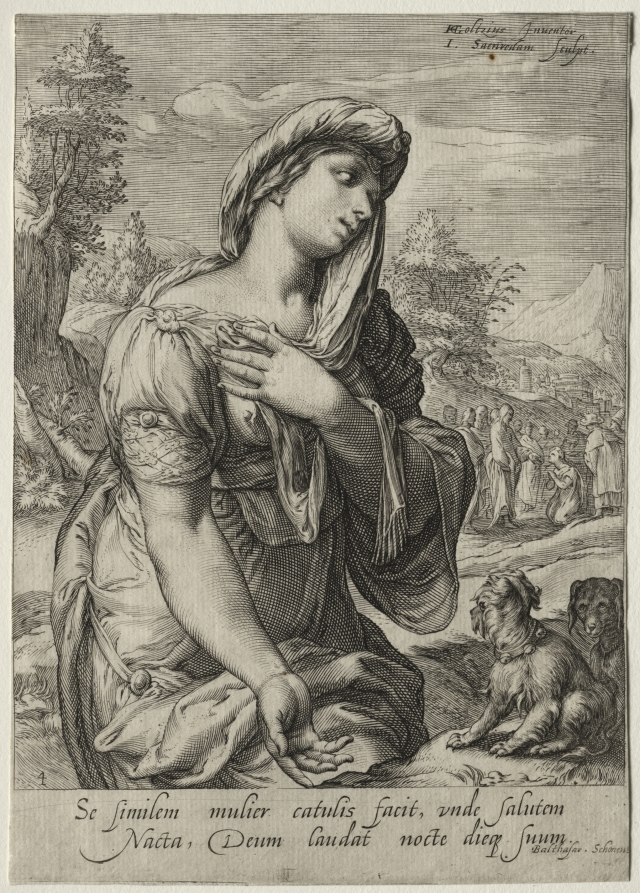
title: Heroines of the New Testament: The Canaanite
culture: Netherlands, 16th century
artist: Jan Saenredam (Dutch, 1565–1607)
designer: after Hendrick Goltzius (Dutch, 1558–1617)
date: c. 1595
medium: engraving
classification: Print